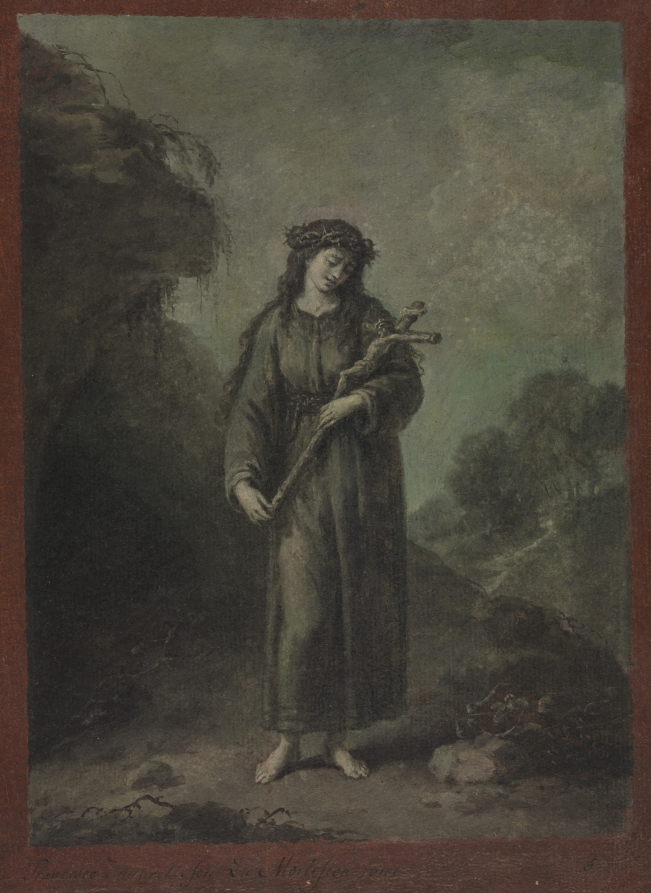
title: The Mortification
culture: Italy, 18th century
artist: Francesco Zuccarelli (Italian, 1702–1788)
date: 1763 or before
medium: oil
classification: Drawing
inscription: signed, lower left, in black ink(?): Francesco Zuccarelli. fec La Mortificazione 5 [all but the 5 underlined in graphite] ; RECTO OF SECONDARY SUPPORT, lower right, in graphite: Morti[illegible] ; VERSO OF SECONDARY SUPPORT, lower center, in graphite: by Zuccarelli / [b?] original Drawings ; lower center, in graphite(?): omp [crossed out, erased] oc[illegible, all erased]